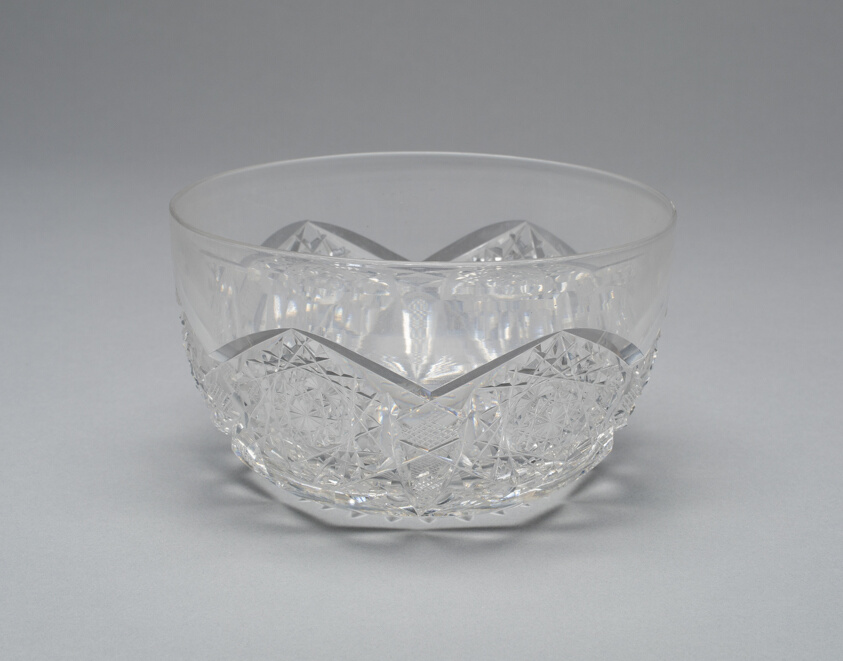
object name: Glass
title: Finger bowl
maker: Artist unknown (American, 19th–20th century)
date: 1885–1900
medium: Cut glass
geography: United States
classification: finger bowl; glass; container; american decorative arts; american arts; decorative arts